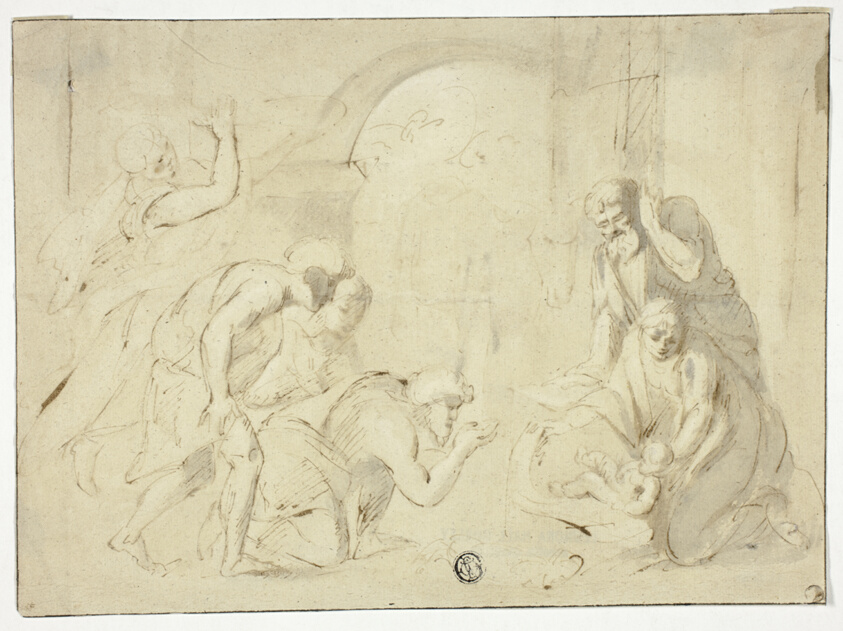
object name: Drawing and Watercolor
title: Adoration of the Shepherds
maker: After Nicolas Poussin; French, 1594-1665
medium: Pen and brown ink with brush and gray wash, on cream laid paper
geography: France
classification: pen and ink drawings; drawings (visual works); prints and drawing